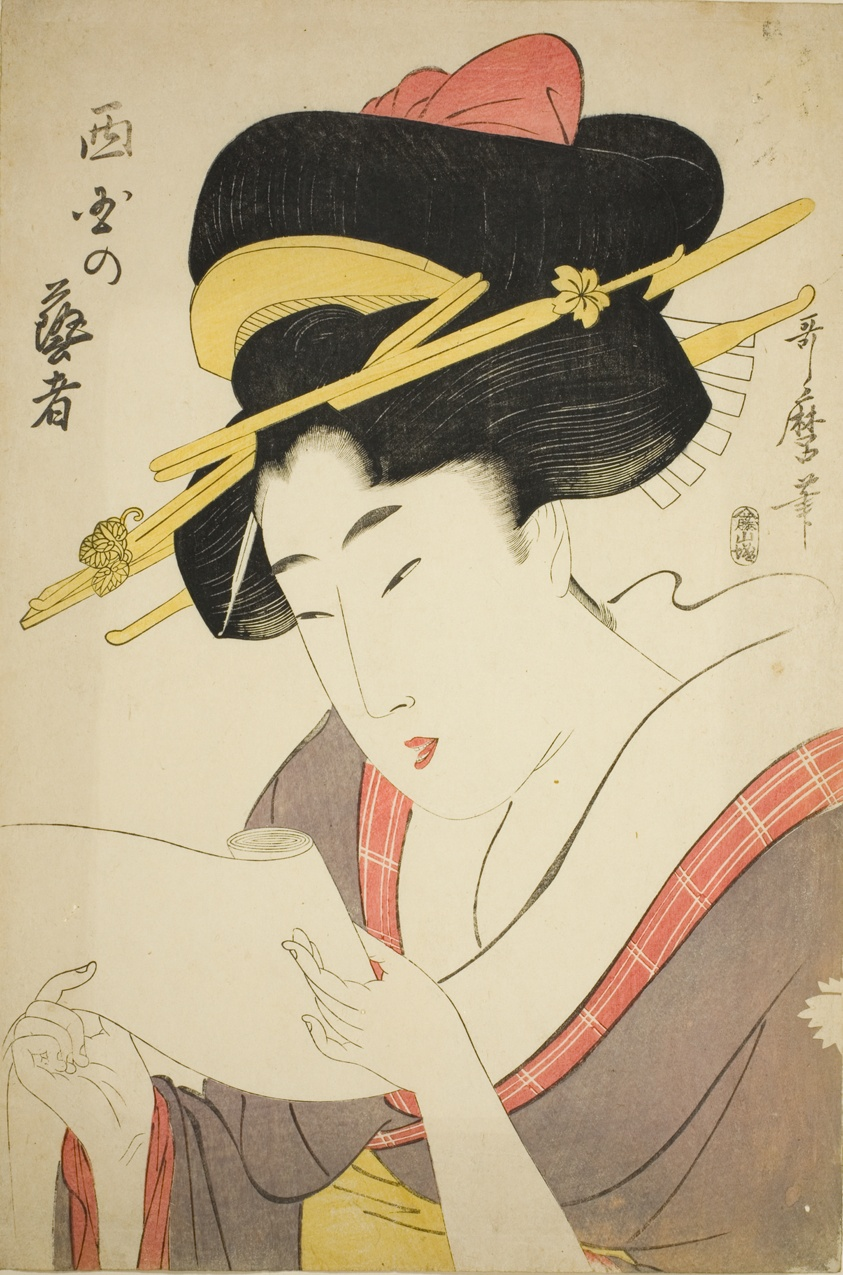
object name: Print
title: Geisha of the West District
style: Japanese (culture or style)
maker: Kitagawa Utamaro 喜多川 歌麿; Japanese, 1753 (?)-1806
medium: Color woodblock print; oban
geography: Japan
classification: woodblock print; print; asian art